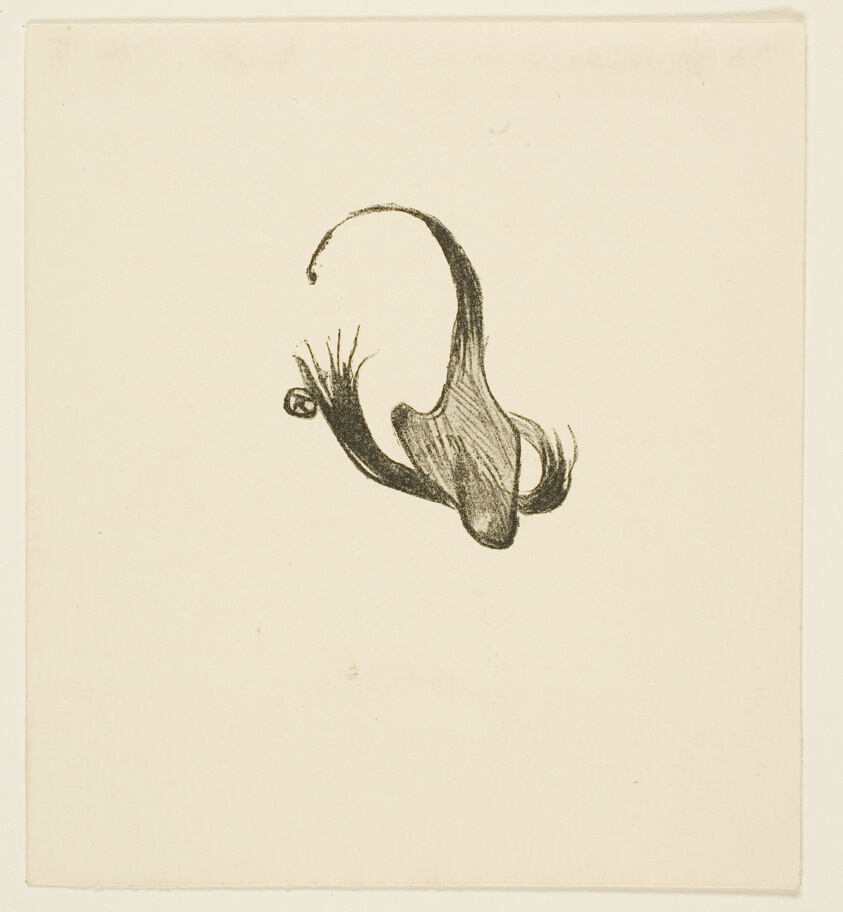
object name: Print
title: Tailpiece from Au Pied du Sinaï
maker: Henri de Toulouse-Lautrec (French, 1864-1901)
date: 1897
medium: Reproduction of a lithograph on cream wove paper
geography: France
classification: print (reproduction); prints and drawing; print